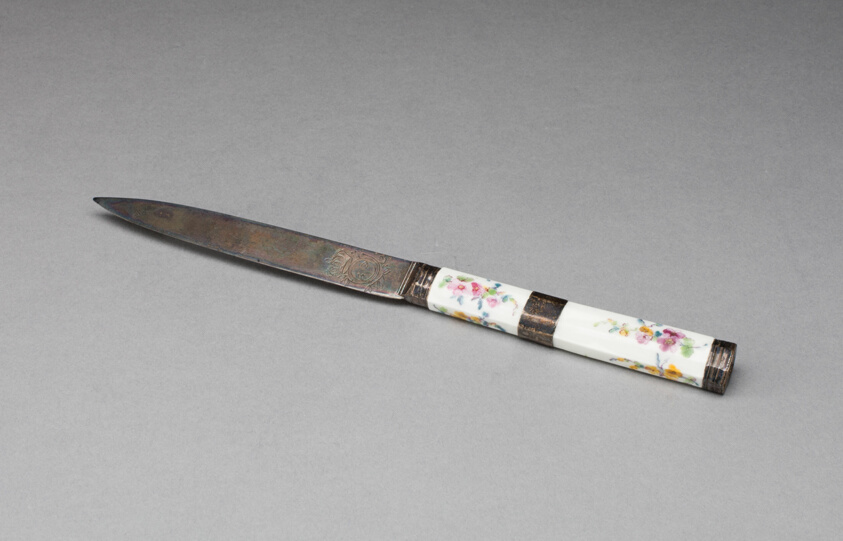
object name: Ceramics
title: Knife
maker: Sèvres Porcelain Manufactory; French, founded 1740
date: 1761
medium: Soft-paste porcelain, polychrome enamels, gilding, silver fittings and blade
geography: Sèvres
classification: tableware; ceramics; porcelain; european decorative arts